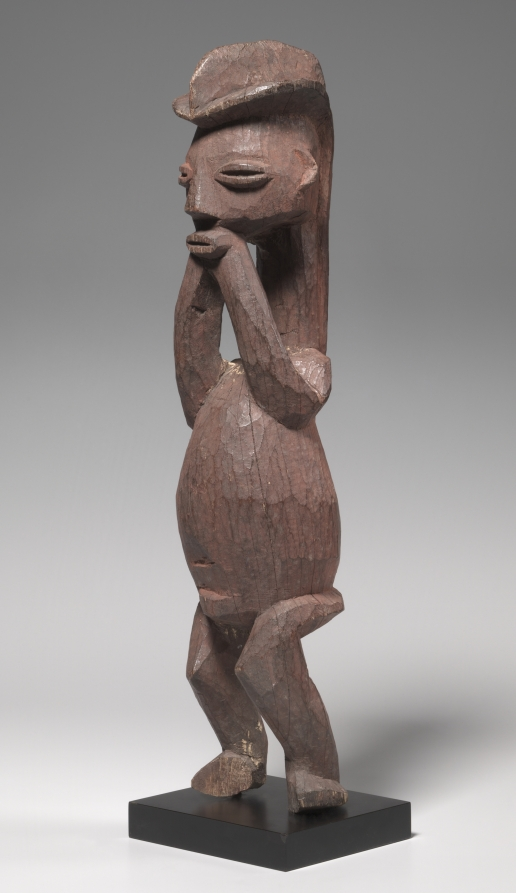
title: Male Figure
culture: Africa, Central Africa, Democratic Republic of Congo, Hungaan-style maker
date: mid- to late 1800s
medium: Wood and colorant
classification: Sculpture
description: Hungaan figures of this size served as guardians of ritual shrines and functioned in rituals to promote fertility, guarantee well-being, and ensure longevity. The striking crested hairstyle imitates a real coiffure or a wig, indicative of status and prestige. The hands supporting the chin identify the figure as a chief who is immersed in thought and contemplation, pondering over his responsibilities.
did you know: The red powdery surface of this figure mimics a red body adornment that mixed ground camwood with palm oil.